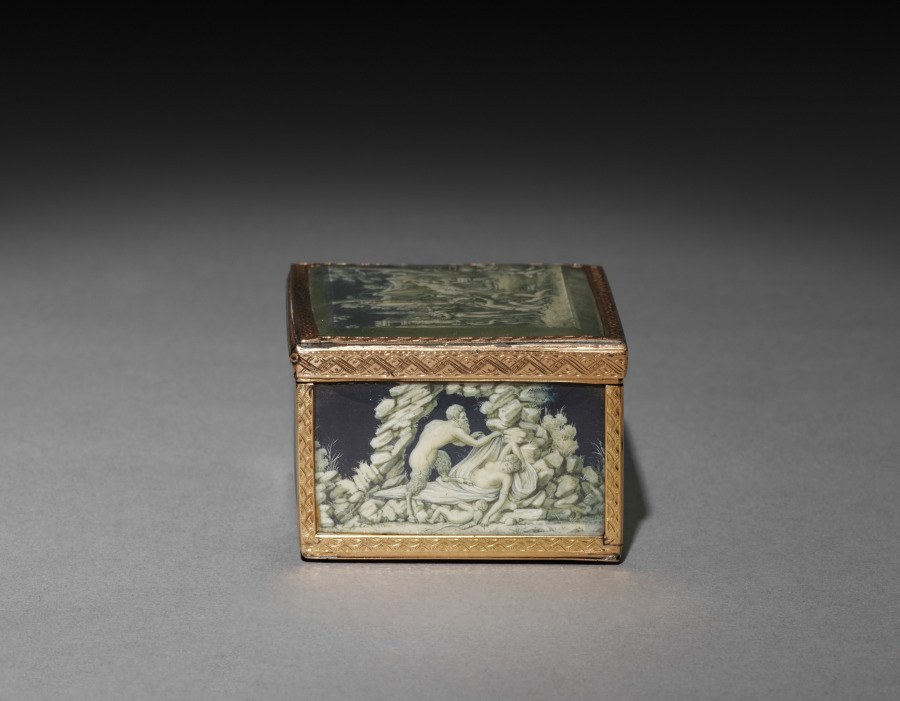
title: Box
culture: France, 19th century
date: 1800s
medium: painted miniatures under glass mounted in gold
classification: Miscellaneous